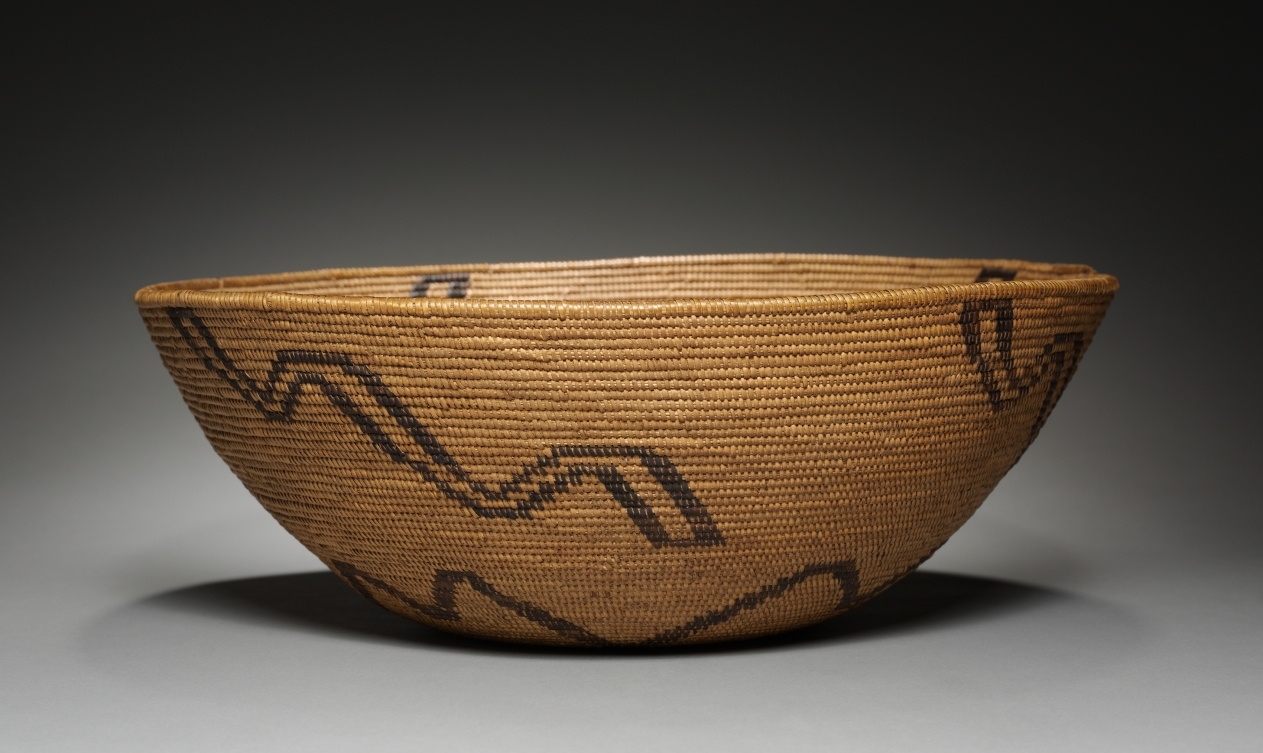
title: Food Bowl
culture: California, Southern, Gabrielino (San Gabriel, Mission or Tongva), Late 19th- Early 20th century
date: c 1875– 1925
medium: coiled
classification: Basketry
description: CMA Bulletin, December 1930